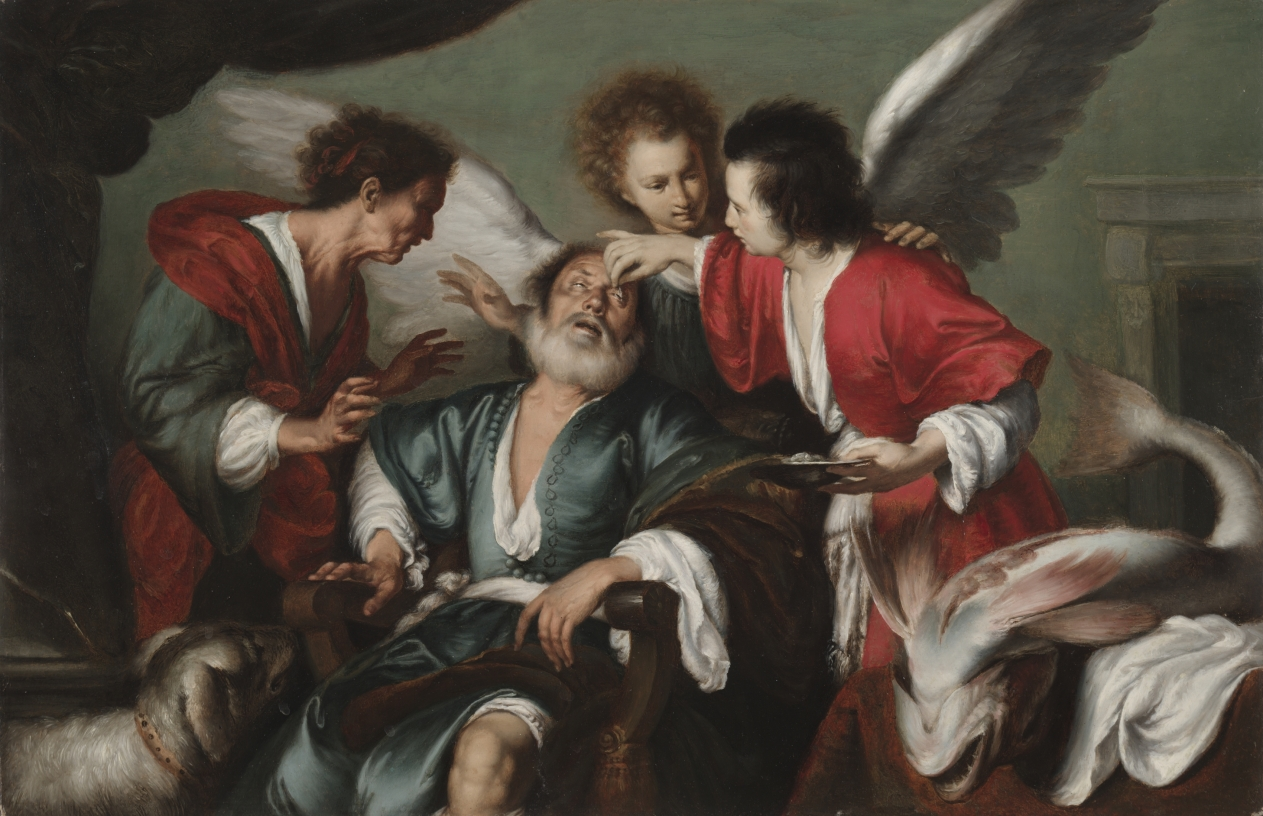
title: The Healing of Tobit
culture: Italy, 17th century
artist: Bernardo Strozzi (Italian, 1581?-1644)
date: c. 1625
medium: oil on wood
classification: Painting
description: This scene is the moving conclusion of the story of Tobias, the young man at the right. It addresses the themes of family devotion and trust. Tobias’s father sent him on a long journey to retrieve family money. The angel Raphael appeared as a relative, offering the traveler protection against such things as an attack by a huge fish, whose organs Tobias took on Raphael’s advice. Upon his return home, Tobias discovers his father has gone blind, and Raphael advises him to place the fish’s gallbladder on his father’s eyes to cure him. Strozzi depicts the miraculous cure and the moment in which Raphael reveals that he is an angel.